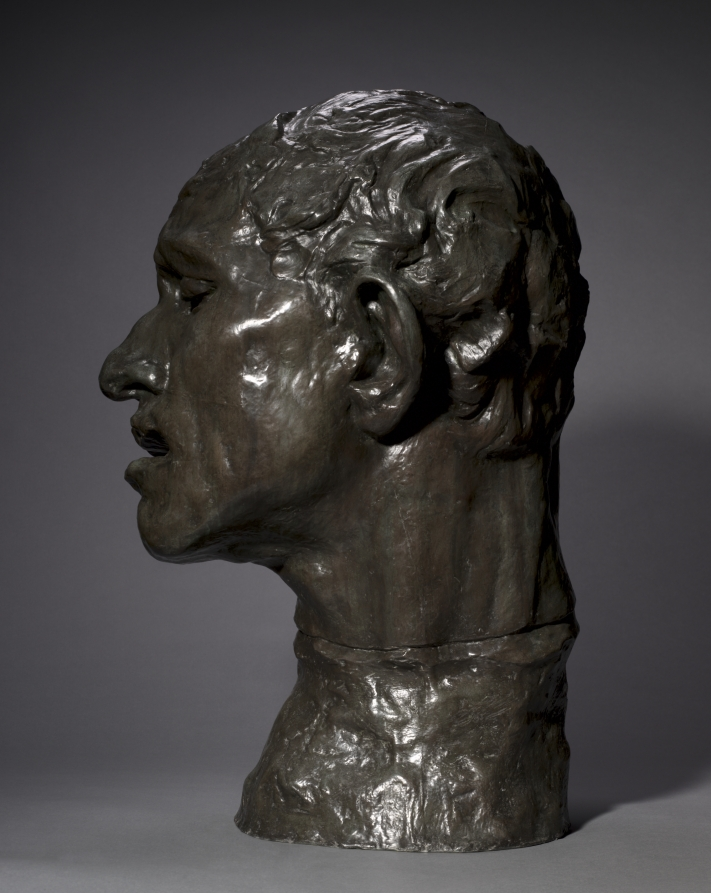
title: Heroic Head of Pierre de Wissant, One of the Burghers of Calais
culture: France, 19th century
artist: Auguste Rodin (French, 1840–1917)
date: 1886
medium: bronze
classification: Sculpture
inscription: inscribed at neck, left: A.Rodin; inscribed lower back: Alexis Rudier/Fondeur-Paris.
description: This sculpture depicts one of the figures in Rodin’s large public monument The Burghers of Calais (1884–89), featuring six French men who volunteered to be taken prisoner by the English in exchange for lifting the siege of Calais during the Hundred Years War (1337–1453). Pierre de Wissant’s anguished expression suggests extreme mental suffering as he contemplates his expected execution. Rodin exhibited a life-size version of the figure as an independent work before completing the monument. He later made multiple versions in various sizes and media.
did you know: This sculpture depicts the head of a figure from Rodin's large public monument The Burghers of Calais (1884-89). The CMA also owns a plaster version of the head.